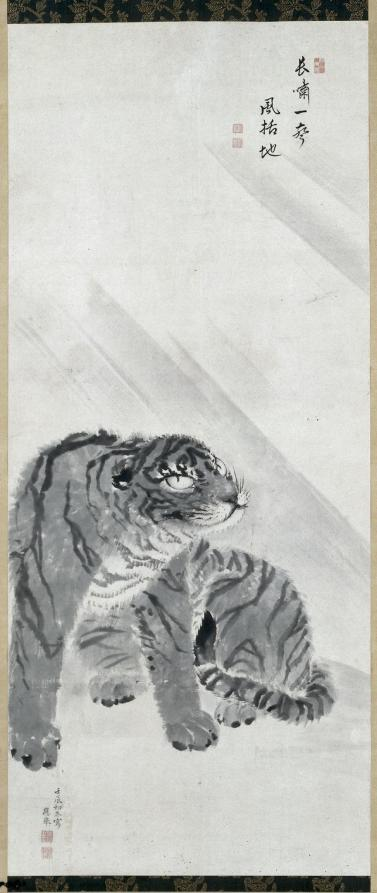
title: Tiger in Wind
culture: Japan, Edo period (1615–1868) to Meiji period (1868–1912)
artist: after Maruyama Ōkyo (Japanese, 1733–1795)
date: 1800s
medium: hanging scroll; ink on paper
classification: Painting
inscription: 「秋空一鶴」賛 長嘯一聲風括地「月渚」朱文方印「祐常之章」白文方印 壬辰初冬寫応挙 「應舉之印」白文方印・「仲選」白文方印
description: The seals appended to the inscription on this painting suggest that the text was brushed by Yūjō (1723–1773), an imperial prince who became a Buddhist monk and was abbot of Enman'in at Miidera. The line is from a poem attributed to a Yuan dynasty poet, Yu Ruyu (dates unknown), and describes the sound of a fierce wind lashing the ground. Wind is associated with the roar of the tiger. Yūjō was Maruyama Ōkyo's most important patron as a young artist, and this painting has a signature asserting that Ōkyo created it in 1772, the year before Yūjō's death. While Yūjō produced a preface for a now famous set of handscrolls he commissioned Ōkyo to paint, and a number of Ōkyo's compositions for Enman'in survive, this work would appear to be one imagining their relationship, as opposed to a genuine piece.